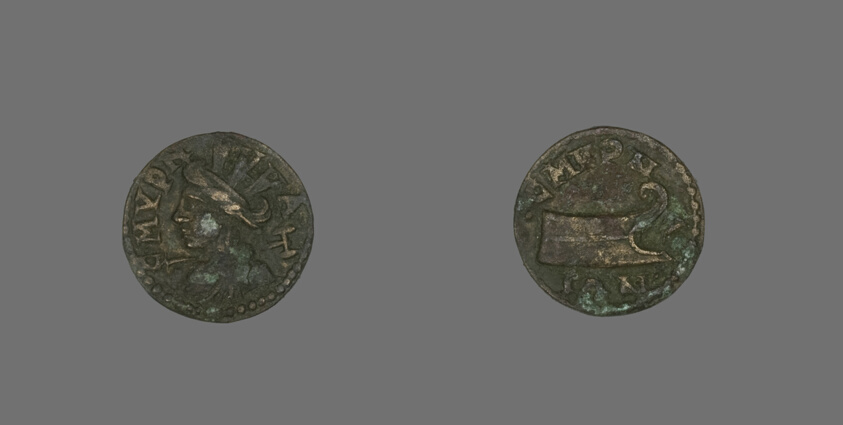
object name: Coin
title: Coin Depicting the Amazon Smyrna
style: byzantine, european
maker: Greek, minted in Ionia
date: 1st-2nd century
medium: Bronze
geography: Ionia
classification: coin; ancient art; struck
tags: mythological figures